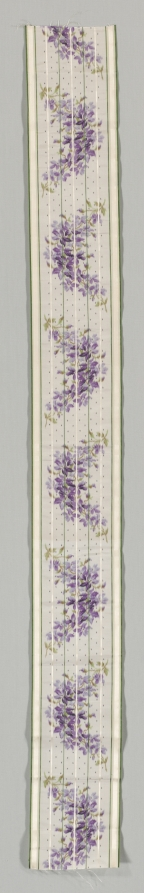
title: Ribbon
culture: France, 19th century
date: 1800s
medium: silk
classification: Textile